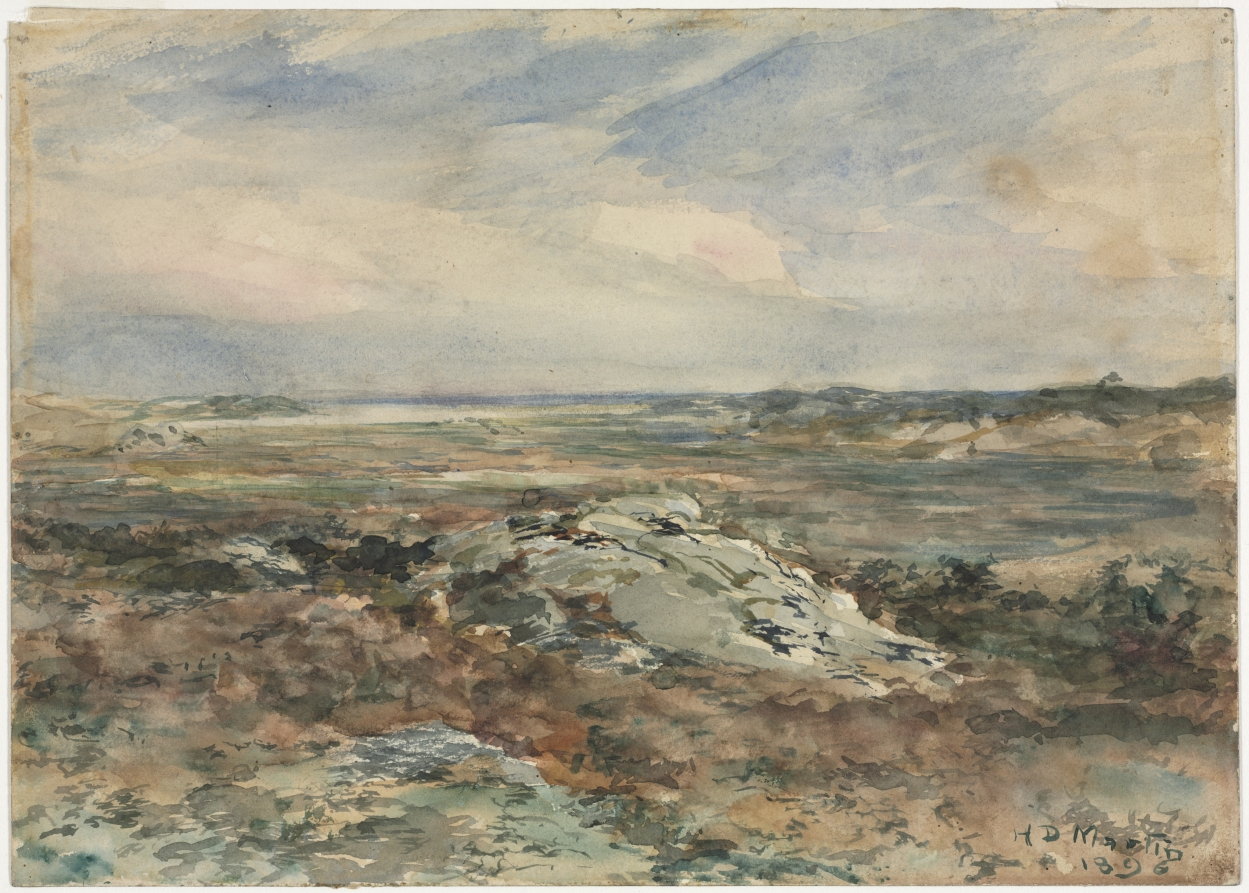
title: Landscape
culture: America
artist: Homer Dodge Martin (American, 1836–1897)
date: 1896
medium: watercolor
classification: Drawing